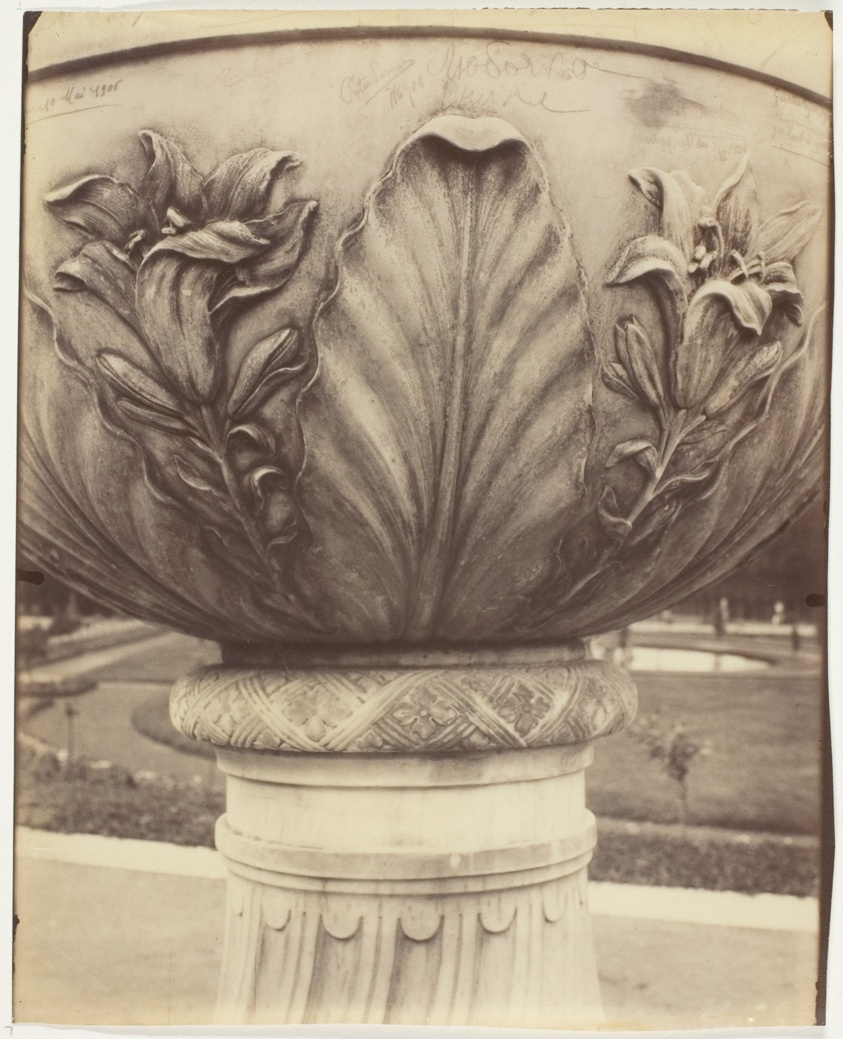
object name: Photograph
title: Versailles, Vase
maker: Jean-Eugène-Auguste Atget (French, 1857–1927)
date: 1906/07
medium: Albumen print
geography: France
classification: albumen silver print; photographic process; photography; photograph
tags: Collected by Hugh Edwards